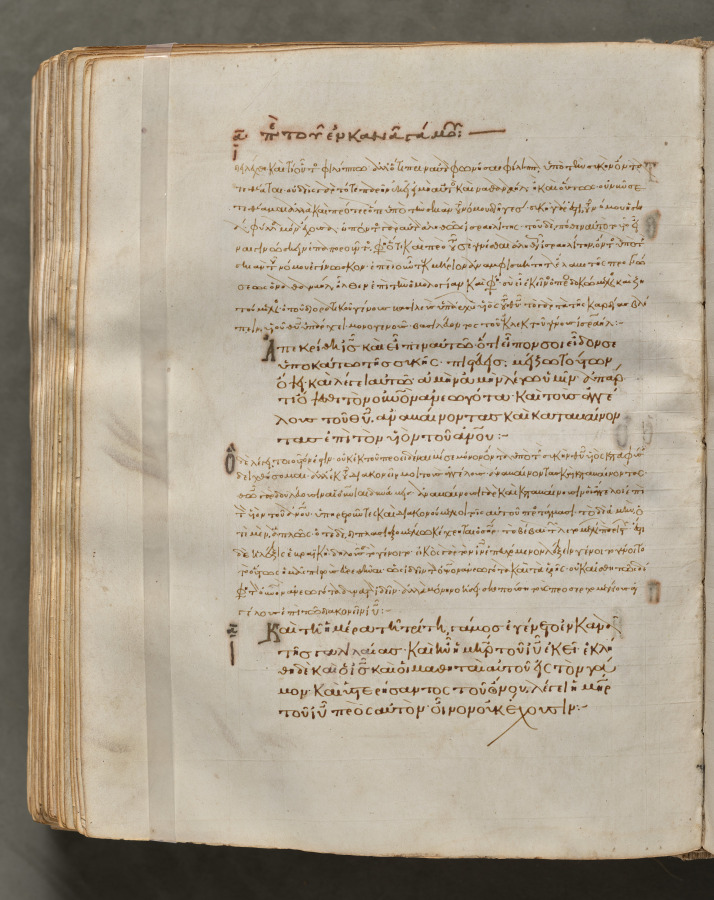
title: Text, folio 329 (verso), from a Gospel Book with Commentaries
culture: Byzantium, Constantinople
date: c. 1000–1100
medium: ink, tempera, and gold on vellum; leather binding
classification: Bound Volume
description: Each of the four gospels in this book opens on a page with brilliantly illuminated borders depicting the author of the text as well as birds—principally peacocks, symbols of the immortality of the soul—and fountains, representing the fountain of life and the salvation of the soul. This volume consists of 428 leaves with texts in Greek. Its level of sophistication suggests that it was probably written and decorated in a monastery in Constantinople.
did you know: Gospel books were carried in procession through Byzantine churches.